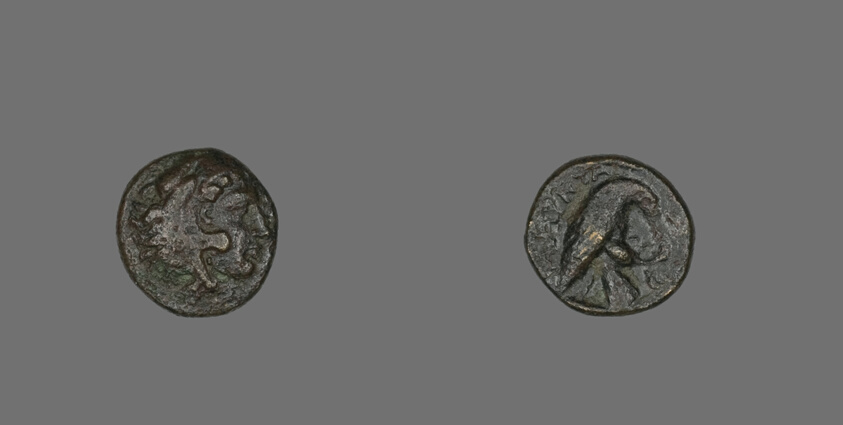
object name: Coin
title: Coin Depicting the Hero Herakles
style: greek, ancient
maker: Greek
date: 381-369 BCE, issued by Amyntas III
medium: Bronze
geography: Macedonia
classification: coin; ancient art; struck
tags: Heracles